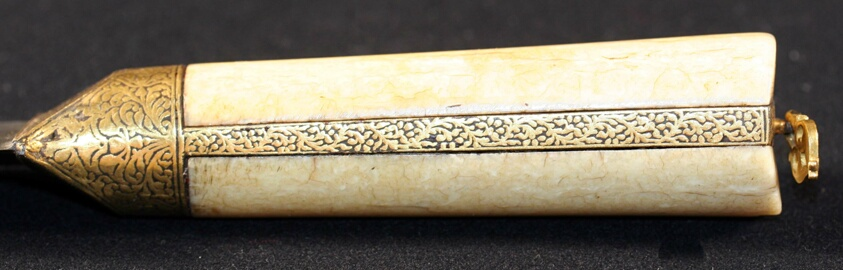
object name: Armor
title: Knife (Kard) with Battling Elephants, Rhinoceros and Lions on the sheath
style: South Asian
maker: India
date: 18th century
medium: Watered steel, ivory, and pierced and chased gold, wood and velvet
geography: India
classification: edged weapon-sword; armor